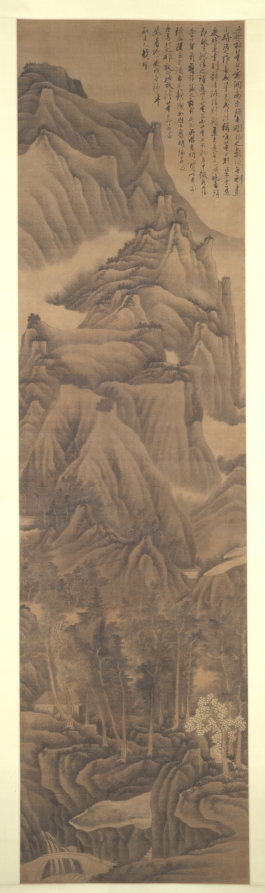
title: Landscape in the Style of Dong Yuan and Juran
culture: China, Qing dynasty (1644-1911)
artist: Gong Xian (Chinese, 1599–1689)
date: c. 1650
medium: hanging scroll, ink with white pigment on silk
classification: Painting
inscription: 畫家董巨，實開南宗。既無剛根之氣，復無刻畫之跡。後之作者或以才見，或以法稱。唯董巨則幾乎道矣。然逞才則離法，泥法則叛道。至道無可道。說者謂即歛才就法之謂道。問之董巨，而董巨不知，忽乎微矣。此幅余二十年前舊作。藏之新安吳氏。吳君晉明寶之若家珍。後携之金陵。命余題識。余因與晉明論畫及此，并紀之。非敢曰此效法董巨而有得焉者也。 庚戌冬杪半畝居人龔賢。 [印]龔半千; 野遺賢; [左下]龔賢; [上]可能另有龔賢一印。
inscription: 2 additional seals of Cheng Qi 程琦 (1911–1988)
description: Towering peaks and unfolding ranges are piled up and overlaid with layer after layer of brushwork to give an overall dense, dark, and even melancholic effect. Gong Xian created a personal style of landscape, which departed greatly from his models Dong Yuan and Juran. The tension between tradition and individuality had been a topic of interest for the Chinese artist. As Gong Xian writes in his inscription: "Painters of later periods may be known for their natural talents or praised for their observance of established traditions. . . . However, those who indulge in showing off their talent will deviate from the tradition, while those who adhere to tradition will alienate themselves from the Dao. The supreme Dao is inexplicable in words. . . ."